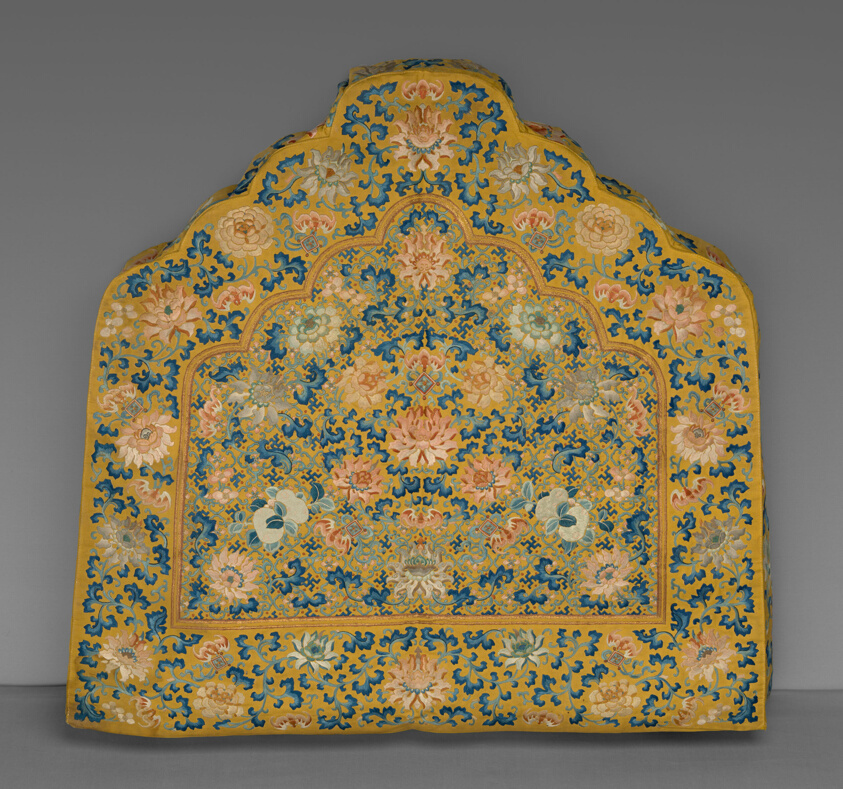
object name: Textile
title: Cushion Cover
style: qing, Chinese (culture or style), East Asian, asian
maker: Manchu (China)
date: Qing dynasty (1644–1911), 1800/25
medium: Front and sides of irregular chair cushion. Satin stitch, stem stitch, knots and couching on yellow twill ground. Lined with coarse yellow damask. Cloud design. Front and sides of irregular chair cushion. 5 sided, 2 sides scalloped. Satin stitch, stem stitch, knots and couching on yellow twill ground. Center panel: symmetric design of lotus, bats, peonies, peaches, diamond symbols and scrolls on ground of all over blue swa etika altersating with pink quatrefoil in frame of 4 juiheads. Double gold stripe around central panel. Border and edge which covered thickness of cushion: blue scroll meander with peony, lotus, bats and diamonds. Lined with coarse yellow demask. Cloud design.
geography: China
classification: textile; needlework (visual works); weaving